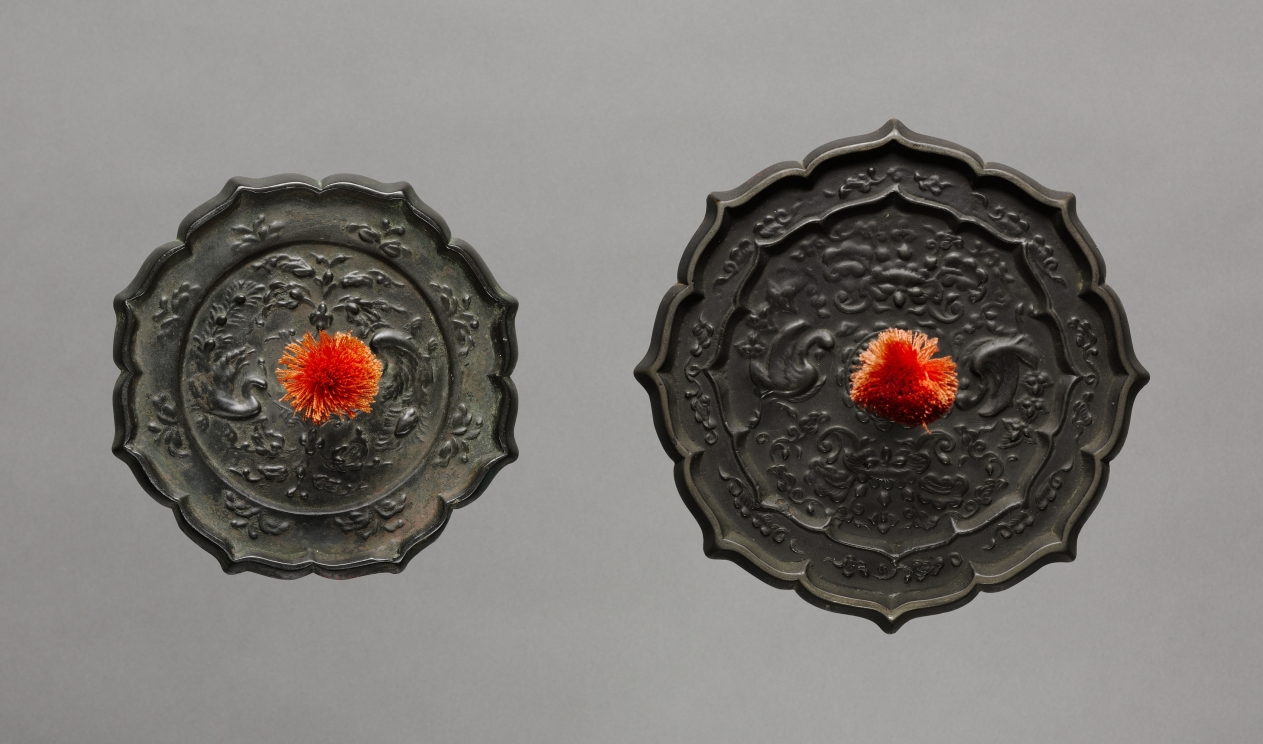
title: Mirror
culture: Japan, Kamakura period (1185–1333)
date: 1185–1333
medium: bronze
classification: Metalwork